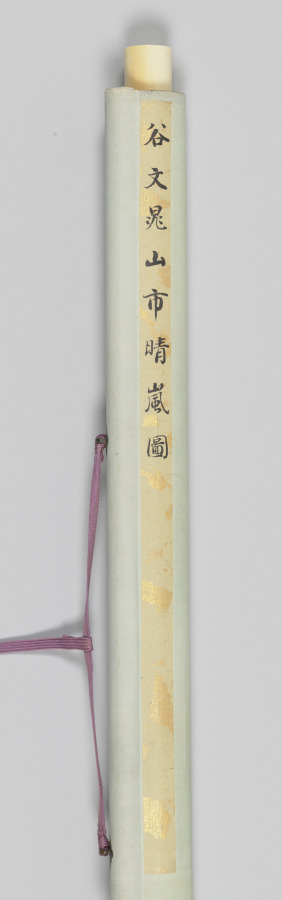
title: Mountain Market in Clearing Mist, from Eight Views of Xiao-Xiang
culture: Japan, Edo period (1615–1868)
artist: Tani Bunchō (Japanese, 1763–1841)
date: 1788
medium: album leaf remounted as a hanging scroll; ink and color on paper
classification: Painting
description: This painting was part of a set of album leaves representing the Eight Views of Xiao-Xiang, a theme originating in Chinese poetry and painting that spread to both Korea and Japan. Southern China’s Xiao-Xiang area, where the mist-covered banks of the Xiang River created a complex landscape shifting like the moods and minds of people, captured the imaginations of generations of painters and calligraphers. Inscriptions on these works suggest that they were possibly ordered by newly prominent Japanese Confucian scholars.